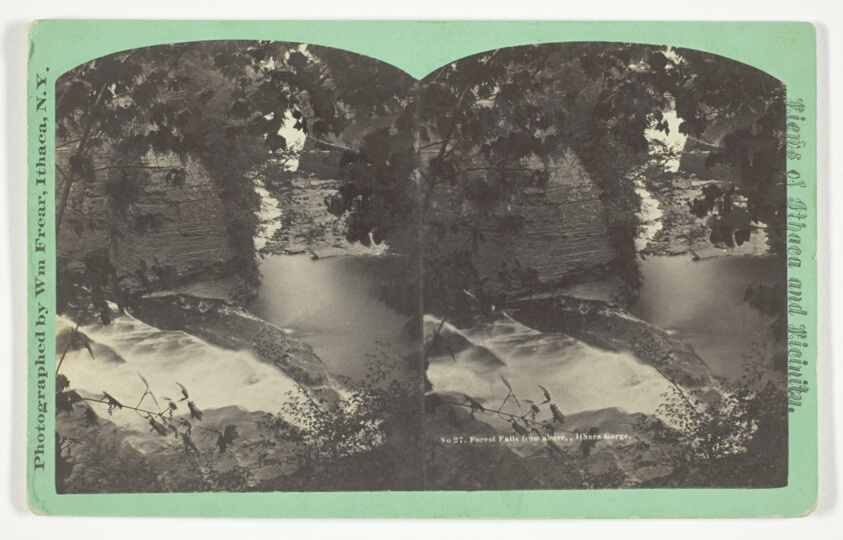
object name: Photograph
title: Forest Falls from above, Ithaca Gorge, No. 27 from the series "Views of Ithaca and Vicinity"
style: 19th century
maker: William Frear (American, active late 19th century)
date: Late 19th century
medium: Albumen print, stereo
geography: Ithaca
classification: photography; photograph; albumen silver print; stereograph (albumen)